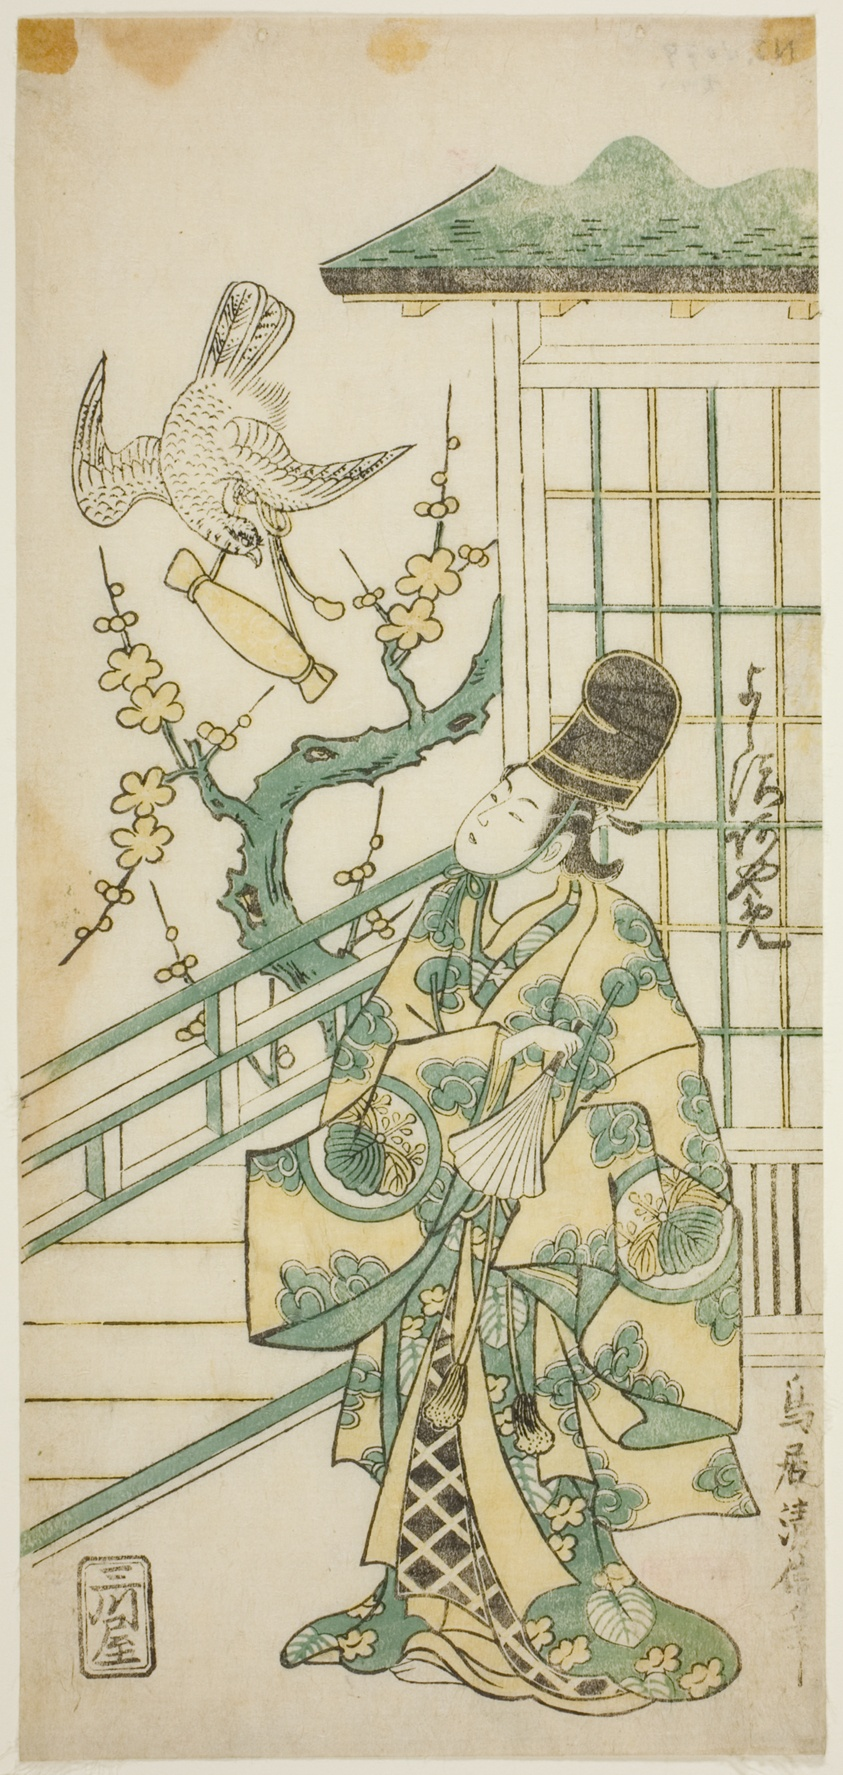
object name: Print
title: The Actor Yoshizawa Ayame II as Hotoke Gozen in the play "Onna Monji Heike Monogatari," performed at the Nakamura Theater in the eleventh month, 1748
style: Japanese (culture or style)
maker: Torii Kiyonobu II (Japanese, active c. 1725-61)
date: 1748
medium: Color woodblock print; hosoban, benizuri-e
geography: Japan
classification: woodblock print; print; asian art